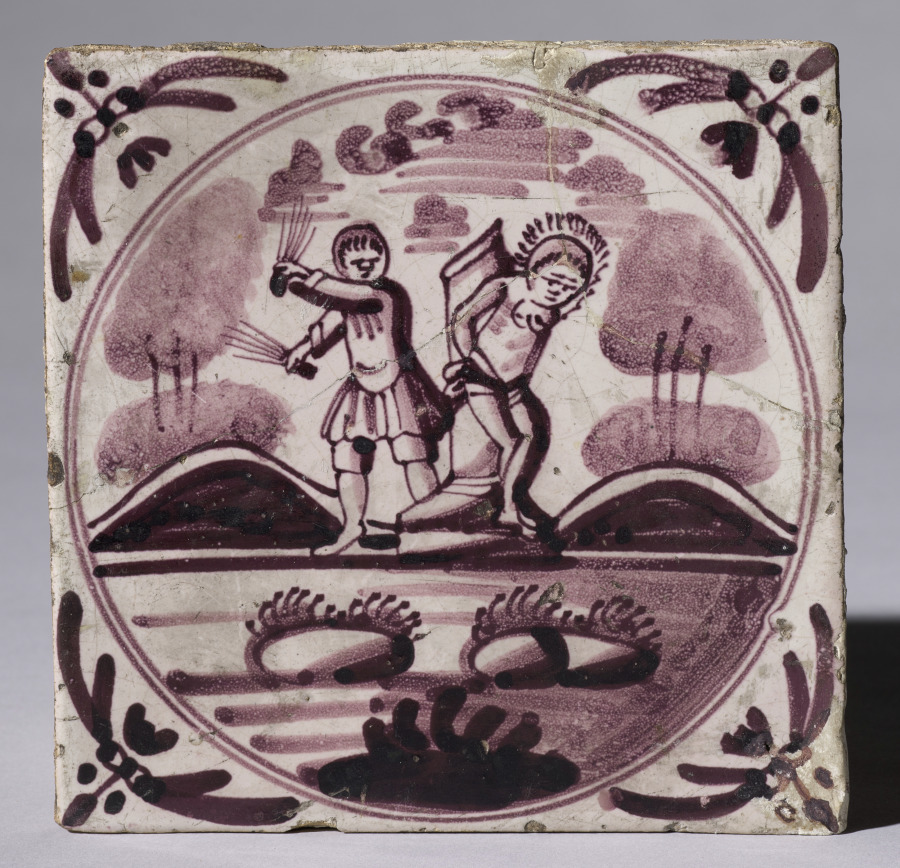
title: Tile–New Testament Scene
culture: Netherlands, Holland, Delft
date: c. 1600s–1700s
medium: glazed ceramic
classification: Ceramic